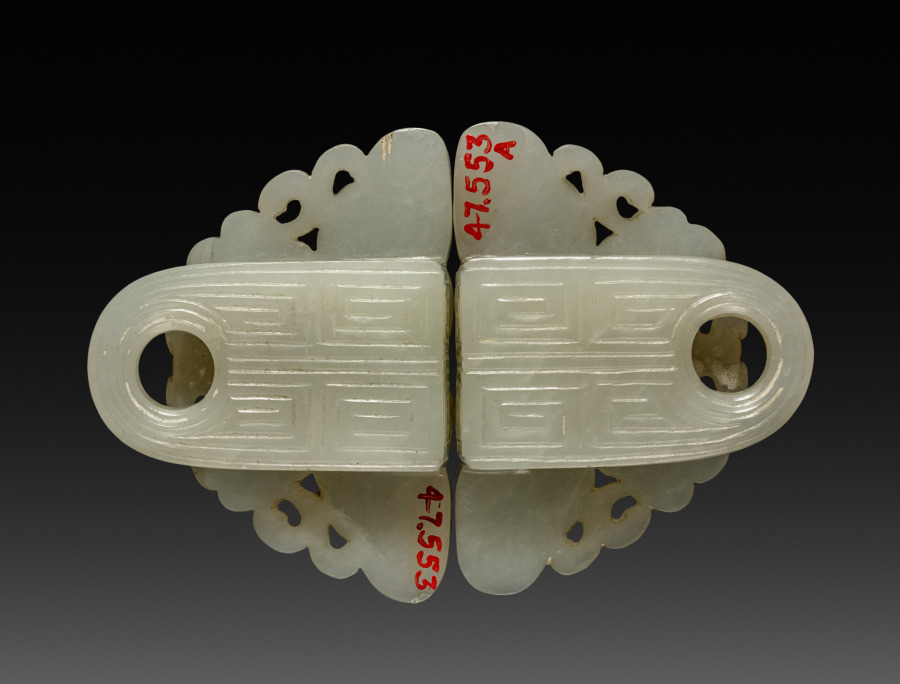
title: Butterfly Buckle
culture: China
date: 1800s–1900s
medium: white jade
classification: Jewelry